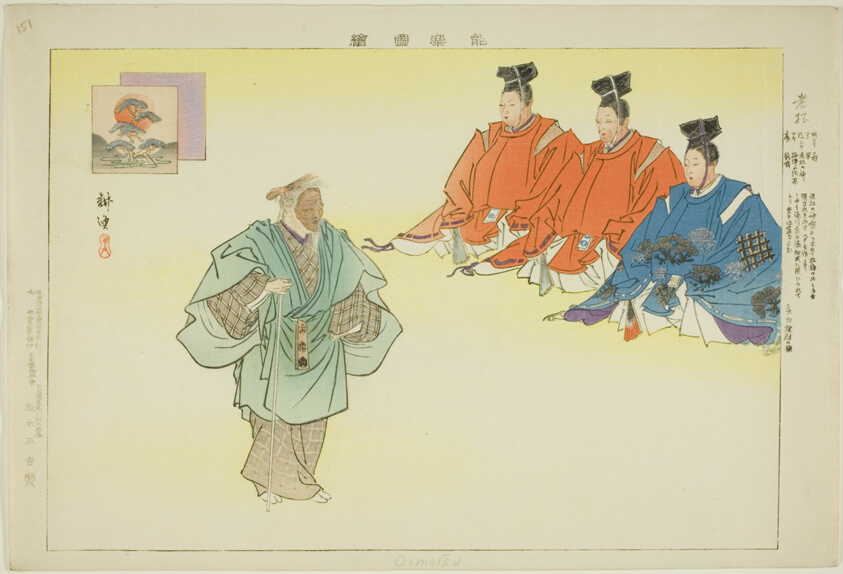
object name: Print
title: Oimatsu, from the series "Pictures of No Performances (Nogaku Zue)"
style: Japanese (culture or style)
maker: Tsukioka Kogyo; Japanese, 1869-1927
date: 1898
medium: Color woodblock print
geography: Japan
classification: woodblock print; print; asian art